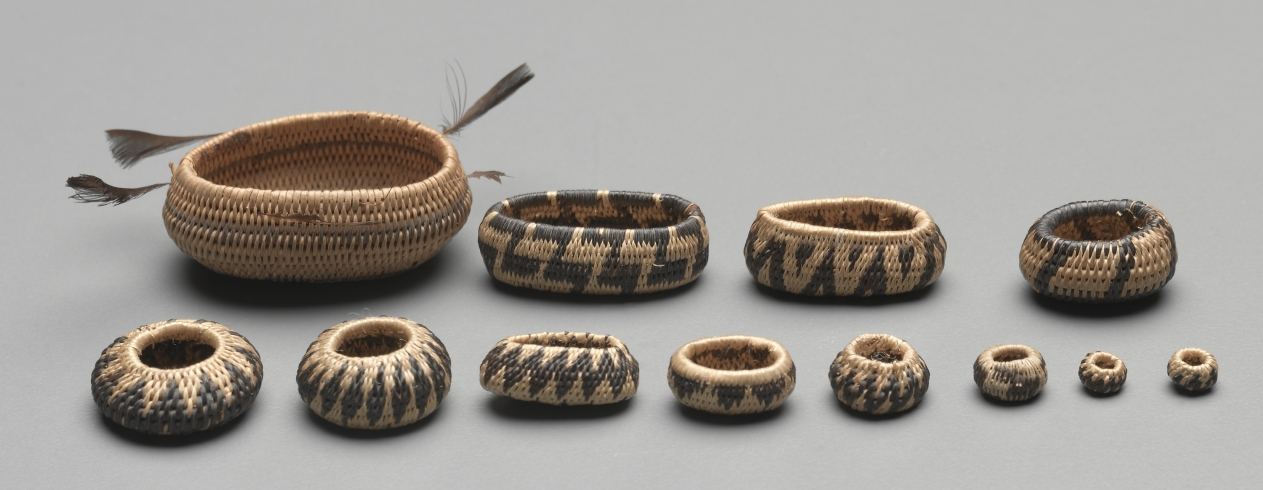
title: Miniature Rhomboidal Basket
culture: California, Pomo, late 19th-early 20th century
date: late 1800s-early 1900s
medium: plant materials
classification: Basketry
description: Miniature baskets were made to demonstrate the basket-maker’s virtuoso skill, and these tiny marvels seem to be no exception—the smallest are just a few millimeters wide but still patterned. For such fine work, dexterity was required as much for preparation of materials as for weaving.